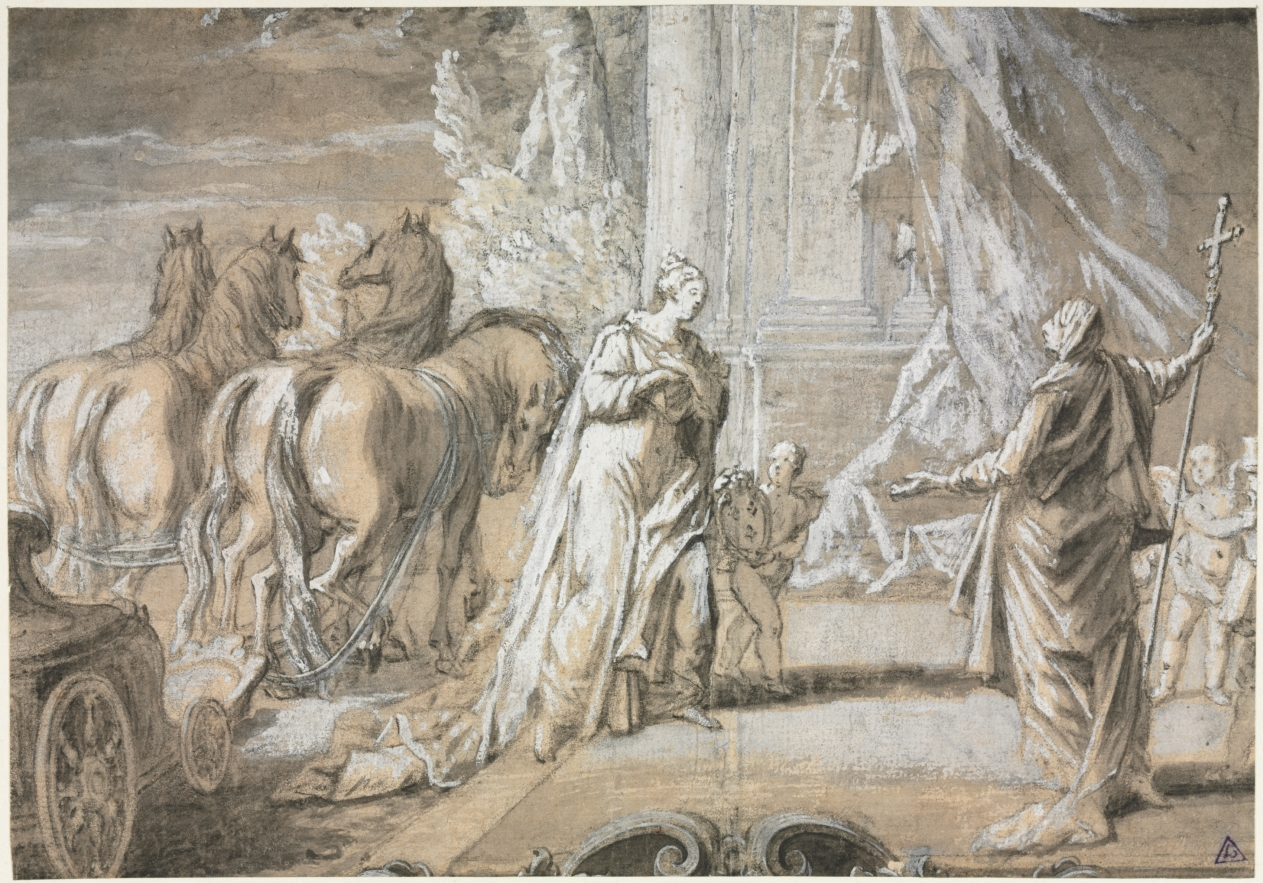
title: Madame de Maintenon Returning to the Catholic Church [2]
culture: France, 18th century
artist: Charles Dominique Joseph Eisen (French, 1720–1778)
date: 1700s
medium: black chalk and brown wash, heightened extensively with white (gouache) and graphite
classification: Drawing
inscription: Faint signature on smaller drawing, upper center within a cartouche: Eisen; on verso of each mount, inscribed in pencil: Charles D.J. Disen 1720-1778/Mme de Maintenon being received back into Catholic Church/Ex collection Marquis de Lagoy (1764-1819) Aix-en-Provence